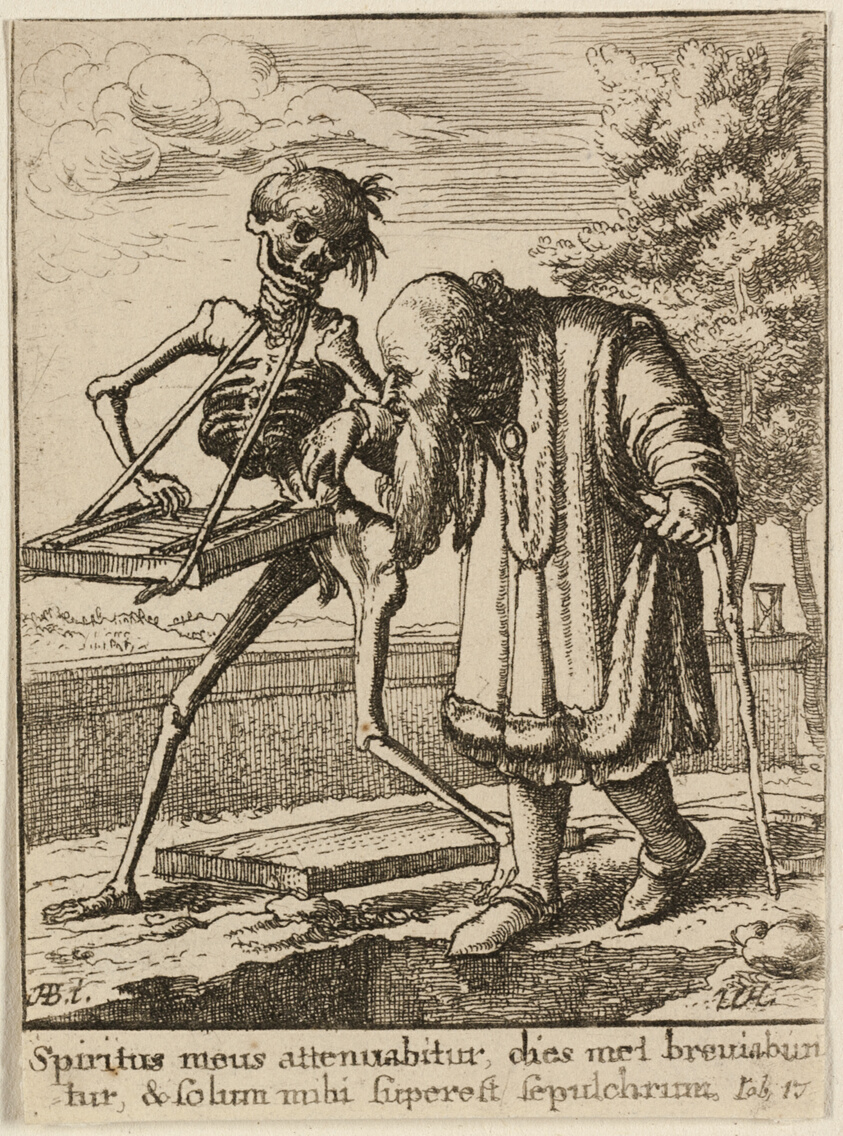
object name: Print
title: The Old Man and Death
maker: Wenceslaus Hollar (Bohemian, 1607-1677); after Hans Holbein the younger (German, c.1497-1543)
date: 1651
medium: Etching on ivory wove paper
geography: Bohemia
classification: etching; print; prints and drawing